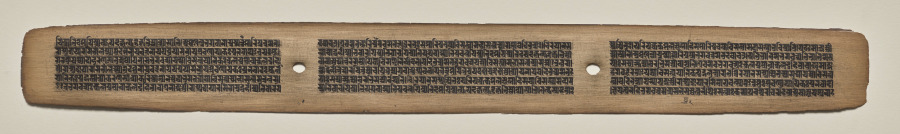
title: Text, Folio 75 (recto), from a Manuscript of the Perfection of Wisdom in Eight Thousand Lines (Ashtasahasrika Prajnaparamita-sutra)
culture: Eastern India, Bihar, Vikramashila Monastery. Painting: Nepal, Kathmandu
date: Sunday, September 14, 1119 (year 239 of the Newar Samvat in the month of Ashvina)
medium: gum tempera and ink on palm leaves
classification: Painting